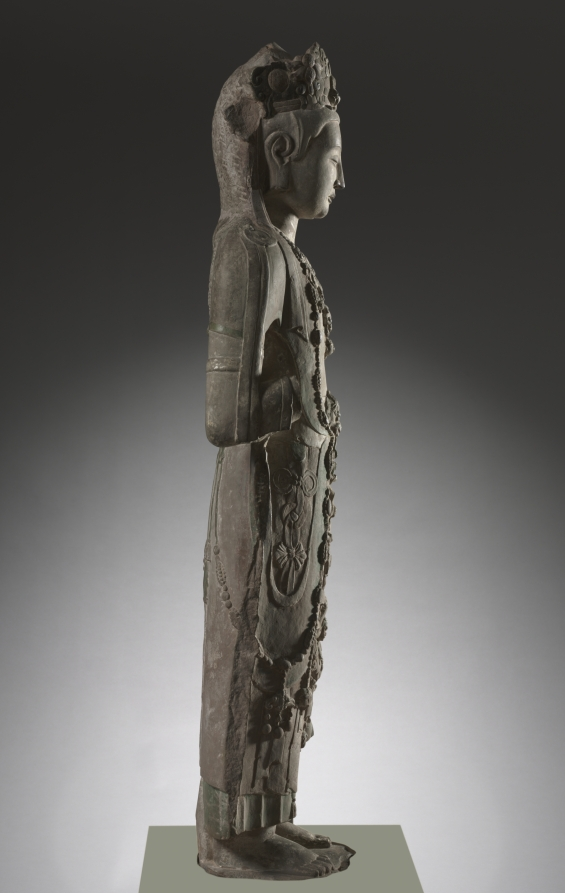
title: Bodhisattva Guanyin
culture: China, late Northern Qi (550–577) or early Sui dynasty (581–618)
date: late 500s–early 600s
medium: sandstone with polychromy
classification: Sculpture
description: The artistic excellence of this bodhisattva is further reinforced by comparable outstanding Chinese Buddhist sculptures excavated at Qingzhou in Shandong Province in 1996—one of the most sensational and significant archaeological finds of the 1900s. Like related types among the Qingzhou finds, this statute has a gently smiling face and meticulous detailing of splendid jewelry. A noticeable difference, however, is the unique yingluo 瓔珞 (mukt hara) worn by the bodhisattva for personal adornment. The somewhat bizarre but imaginative combination of a string of jewels with grotesque animal masks, flying apsara, jade pendants, dragons, and metal ornaments was probably a regional decorative style of Shanxi Province.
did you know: The carved and painted back suggest that the bodhisattva was originally displayed where it could be viewed in the round.